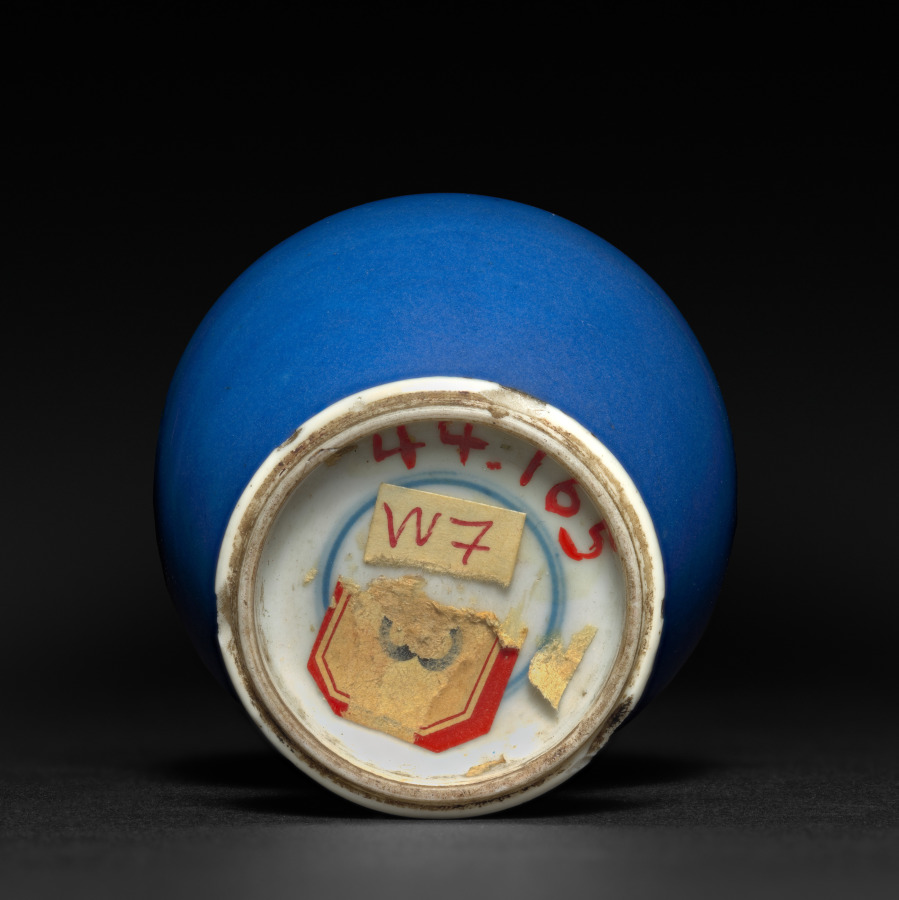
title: Miniature Vase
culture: China, Qing dynasty (1644-1911), Kangxi reign (1662-1722)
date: 1662–1722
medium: porcelain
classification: Ceramic